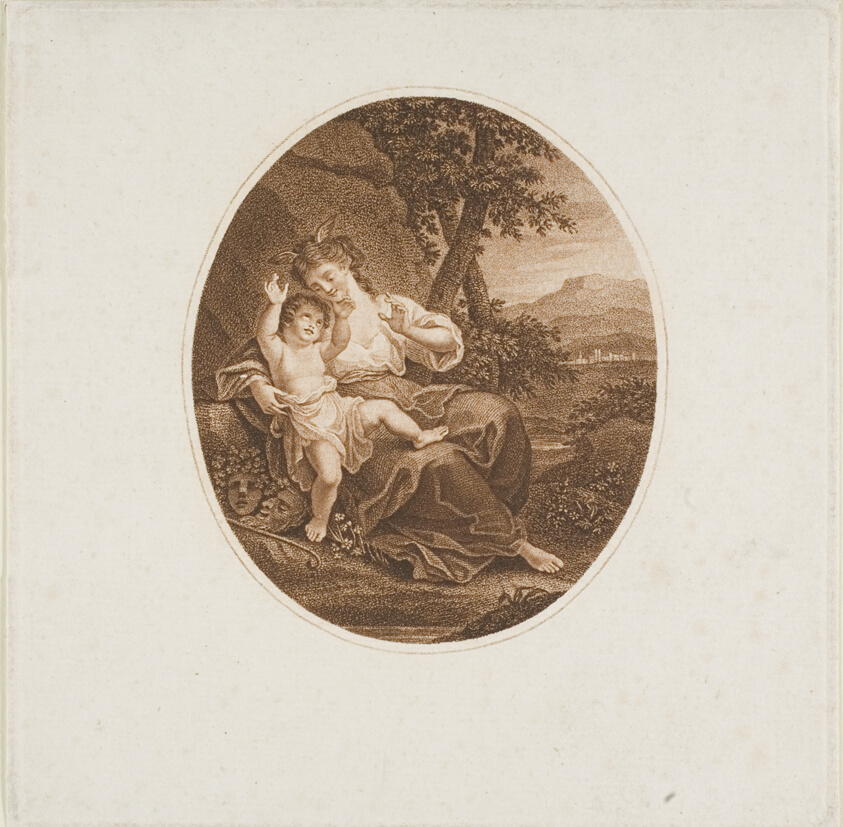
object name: Print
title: Sappho Listening to Love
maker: Francesco Bartolozzi (Italian, 1727-1815)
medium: Stipple engraving on ivory laid paper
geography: Italy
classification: engraving; print; prints and drawing